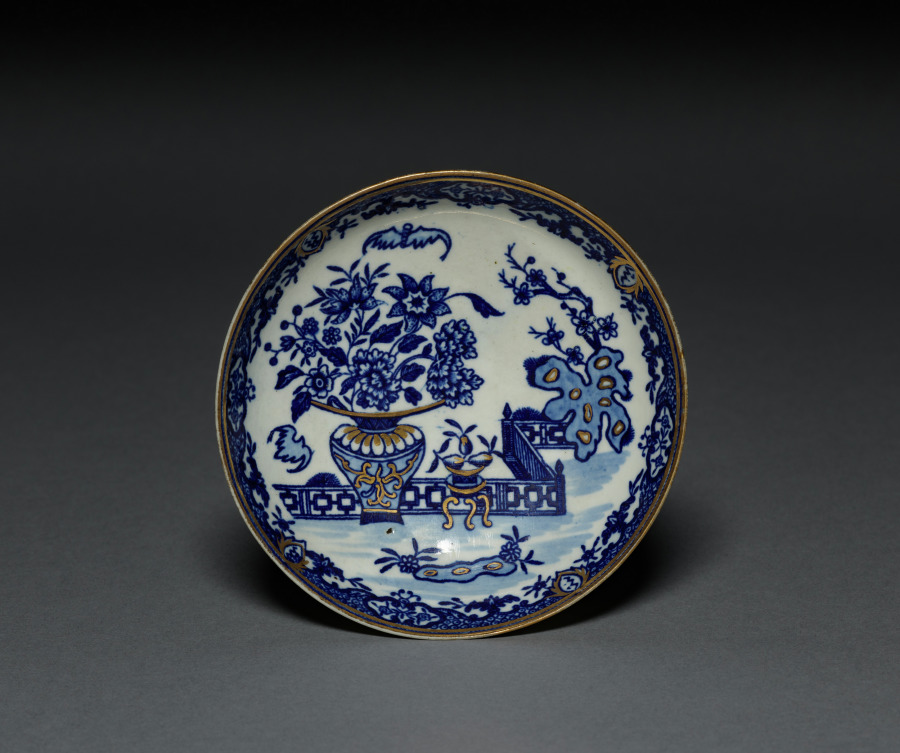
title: Saucer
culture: England, 18th century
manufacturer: Worcester Porcelain Factory (British, established 1751)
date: 1760–1780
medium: porcelain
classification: Ceramic